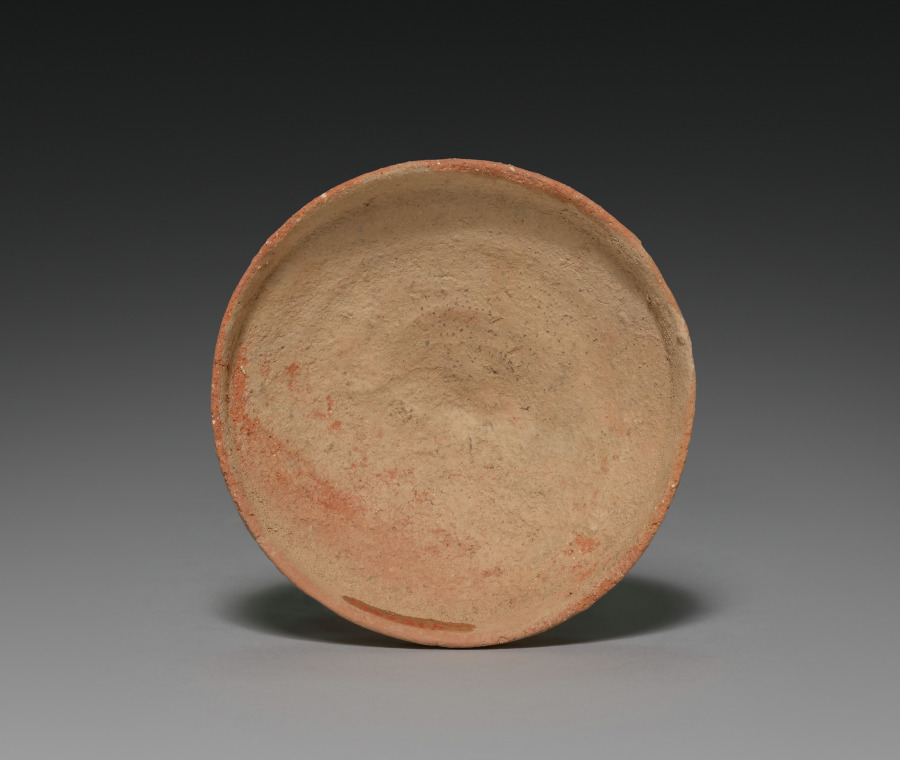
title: Covered Jar with Horn Handle (lid)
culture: Korea, Silla (57 BC-935) or Kaya (AD 42-562) period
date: 400s–500s CE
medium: red earthenware with impressed designs and applied red slip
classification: Ceramic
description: Early earthenware from the Three Kingdoms period (57 BCE–668) became widely utilized as agriculture and religion grew to be essential elements in sustaining society and its systems. The clay jars of different sizes and shapes on display were made for the following purposes: some were used to store harvested grains and seeds, some, especially lidded ones such as this example, to preserve cremated remains, and some to serve offerings in rituals.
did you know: Closed kilns built on hillsides became widely used for producing this type of pottery vessel in Korea during the Three Kingdoms period.